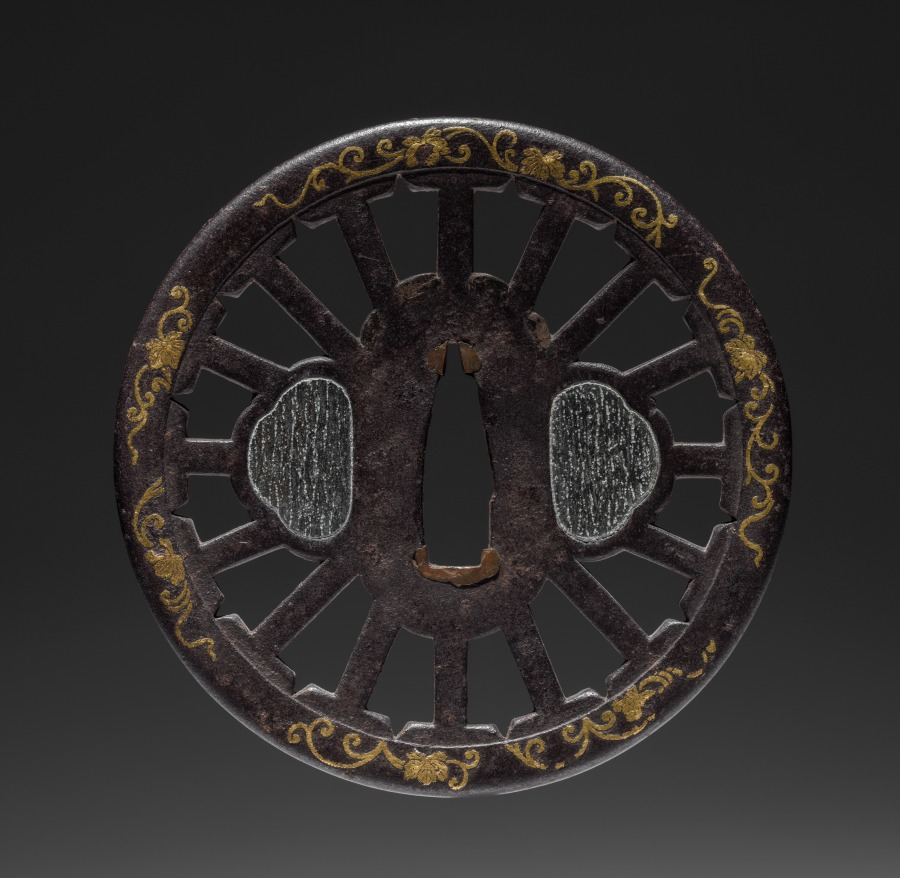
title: Sword Guard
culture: Japan, Edo period (1615–1868)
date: 1615–1868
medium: iron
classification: Arms and Armor